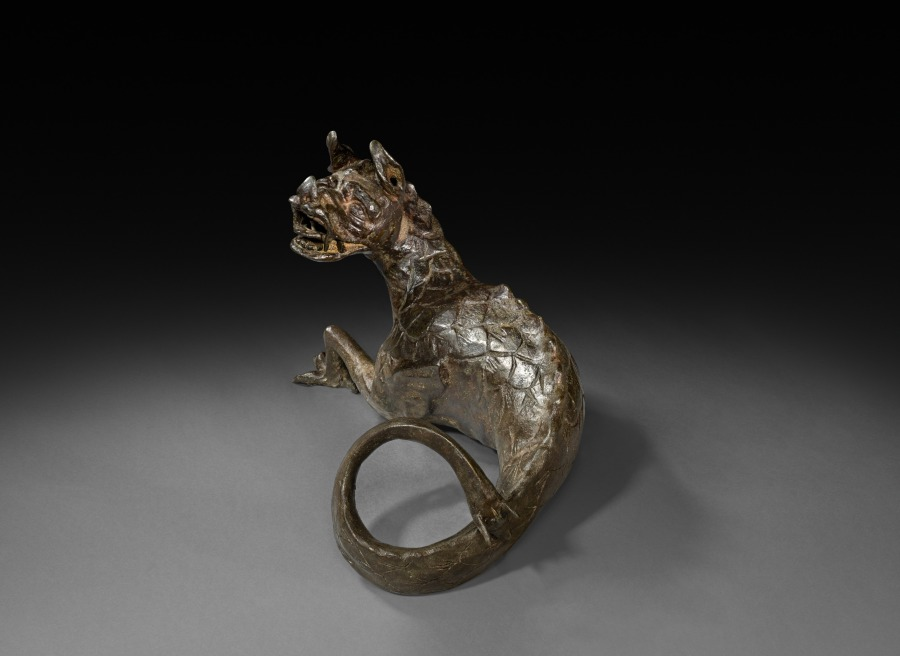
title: Dragon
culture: Italy, 18th century or later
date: 1700s or later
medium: bronze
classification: Sculpture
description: This figure was probably originally meant to serve as the decorative foundation to a larger object such as a casket or urn. In transition from decorative motif to independent work of art, the nether half may have been an addition, evidenced by the seam along its torso.